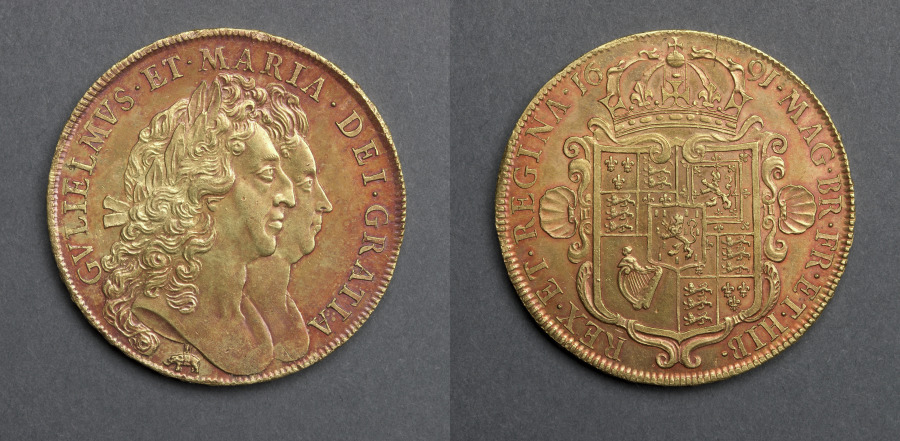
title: Five Guineas: William & Mary (obverse); Crowned Shield of Arms (reverse)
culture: England, William and Mary, 1688-1694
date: 1691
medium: gold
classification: Coins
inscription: GVLIELMVS. ET. MARIA. DEI. GRATIA.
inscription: MAG·BR·FR·ET·HIB·REX·ET·REGINA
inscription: DECS ET TUTAMEN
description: William of Orange-Nassau, and his wife Mary, daughter of James II, were proclaimed joint monarchs. Thus both their heads appear on their coinage. The only other instance of this in England is in the reign of Philip and Mary, 1554–58. Below them is a small elephant representing Guinea, the origin of the metal. William and Mary were invited to the English throne after James II had been driven from it, mainly because the people feared he was about to re-establish the Church of Rome.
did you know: The shield of arms includes Ireland, represented by a harp, and Scotland, represented by a lion.